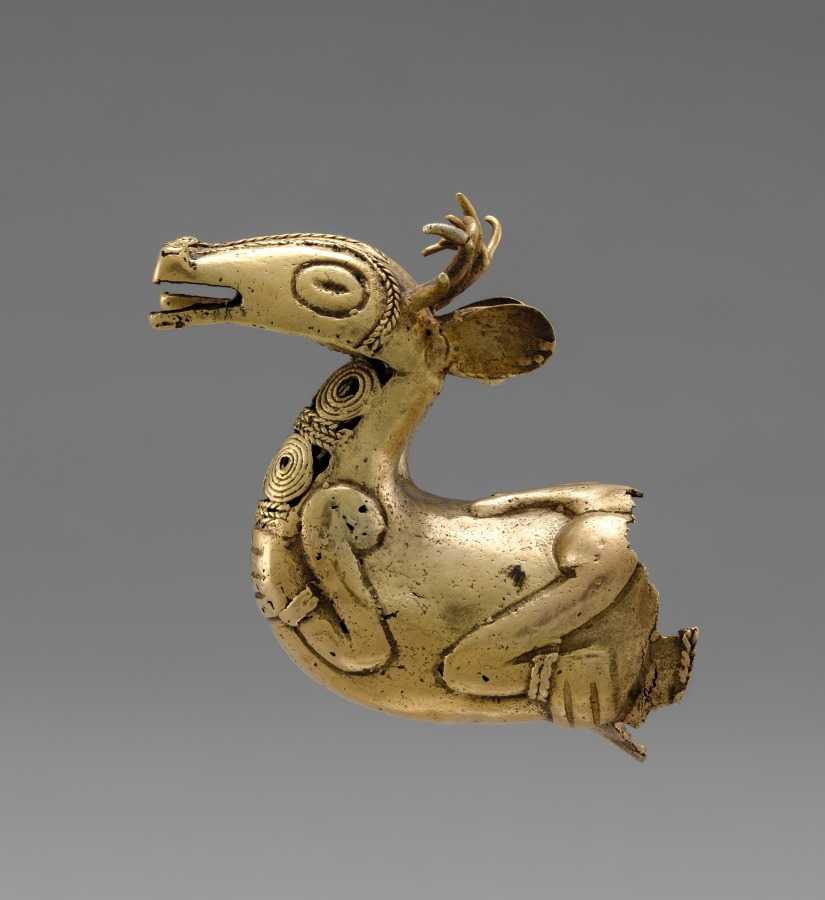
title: Finial with Two Deer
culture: Isthmian Region (Colombia), Sinú (Zenú), 5th century-11th century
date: 400–1000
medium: gold, cast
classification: Metalwork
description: Unique to Colombia's Sinú region are gold finials with sculptural images at right angles to thimble-like caps; the caps fit over the end of a staff, an emblem of rank that may have been held horizontally. This impressive finial features two deer (or a single creature with two deer heads) that hold human-like hands over their chests. Sinú animal imagery is understudied but may relate to beliefs about the cosmos. For instance, contemporary natives attribute importance to birds because they have the capacity to move among different environments (air, land, water); they may have been regarded as mediators among levels of the cosmos.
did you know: This exquisite finial was made using the lost-wax casting process.